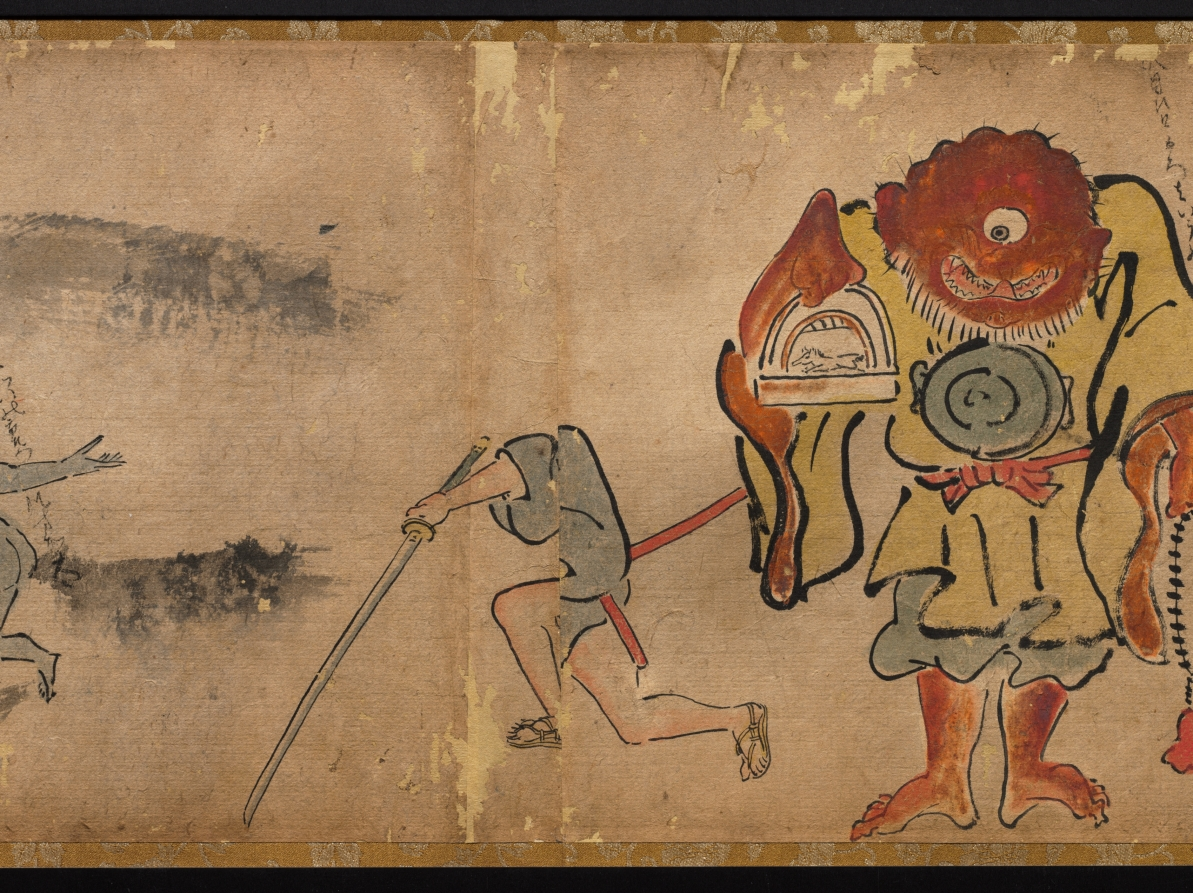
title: The Illustrated Tale of Oishi Hyōroku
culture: Japan, Edo period (1615–1868)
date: 1700s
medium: handscroll; ink and color on paper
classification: Painting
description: This incomplete handscroll illustrates part of the story of Oishi Hyoroku, a young man tasked with battling fox apparitions who were creating problems in his town. In other extant versions of the scroll, the story is set in the fall of 1624 in Kagoshima in southern Japan. Throughout the story, Hyoroku is tricked and terrified by the foxes that shift their shapes into a variety of monstrous phantoms. After repeated humiliations, he eventually captures two of the foxes. In this version, colloquial texts that function like text blurbs in comics appear throughout the scroll, but the main text is missing.